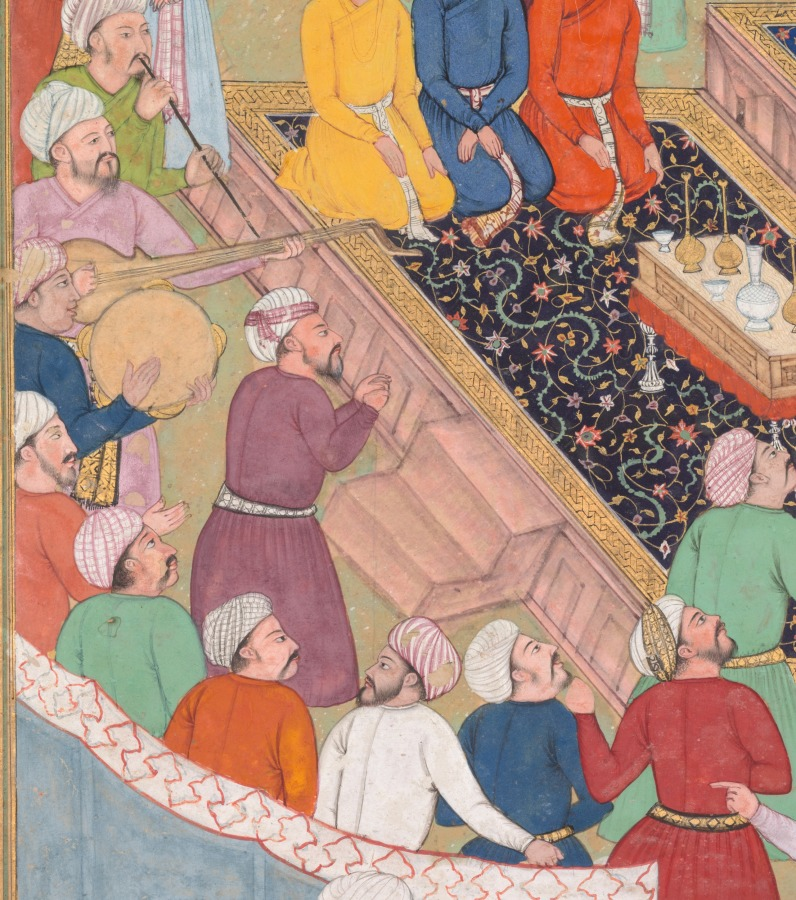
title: Hulagu Khan giving a feast and dispensing favor upon the amirs and princes, from a Chingiz-nama (Book of Chingiz Khan) of the Jami al-tavarikh (Compendium of Chronicles)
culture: Mughal India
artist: Lal (Indian, active c. 1555–1600)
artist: Dharam Das (Indian, active c. 1580–1605)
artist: Padarath (Indian, active late 1500s)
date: c. 1596–1600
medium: Gum tempera, ink, and gold on paper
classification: Painting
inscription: inscription at the base of the painting: tarih Lal 'amal-i Dharam Das tuze name cherehe Padarath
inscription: Persian inscription in top margin, in nasta‘liq script: Hulagu Khan giving a feast and dispensing favor upon the amirs and princes Persian inscription in bottom margin, in nasta‘liq script: Outline drawing by Lal, [color] work by Dharam Das, important portraits by Padarath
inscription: Verso: Text of Hulagu Khan giving a feast and dispensing favor upon the amirs and princes Persian text in nasta‘liq script: [cont. from recto] in the Land of Sham [Syria], [that] would surrender if he [Khurshah] gave the word; otherwise, it would have taken years before they could be overrun. So he [Hulagu] kept him for a while, and he was treated with respect and dignity. And then he dispatched him to the service of the Great Khan [Mongke]. And regarding his [Khurshah’s] death, there are different versions. The truth is that when news reached the Great Khan that Khurshah was on his way, he said: “Why are they bringing him [here] and tiring the packhorses to no purpose?” And he [Mongke] dispatched envoys who did away with him en route. And at this end, after Khurshah had been sent off on the road, they murdered his entire family and household on the road between Abhar and Qazvin, including men, women, and infants still in their cradles, so that not a trace of them was left. And the duration of the rule of the Ismailis in these regions is around one hundred and seventy-seven years, starting from the year four hundred and seventy-seven [AD 1084], and the word “Alamut” is its chronogram. It ended on the first of Dh’ul Qa’da 654 [20 November 1256]. And the number of their rulers is seven, in this manner and sequence: first, Hasan son of Ali son of Muhammad al-Sabbah al-Hamayri; second, Kiya Buzug Ummid, and he and Hasan [the first ruler listed] were both Ismaili missionaries; third, Muhammad Hasan Buzurg Ummid, who is known as ‘Ala dhhkirhi’l-Salam; fourth, Hasan son of Muhammad Buzurg Ummid; fifth, Muhammad Jalal al-Din son of Hasan and they call him Hasan the New Musulman; sixth, ‘Ala al-Din son of Muhammad son of al-Hasan son of Muhammad; seventh, Rukn al-Din Khurshah son of ‘Ala al-Din, in whose time the dynasty fell. And the conquest of those fortresses and edifices is finite proof of the plenitude of the good fortune of Mongke Khan and his brother Hulagu Khan, who managed to accomplish such a momentous task in such a short span of time with such ease and facility; for had it not been for that good fortune, the conquered domains would have been ruined, faced with the difficulties of providing and transporting provisions and drink. These are the events and accounts of the conquest of the lands of the Ismaili heretics, as mentioned above. Finis. The narrative of Hulagu Khan turning toward Kohistan after the capture of the heretics’ fortresses and receiving Bayju Noyan from Anatolia and his interrogation by Hulagu Khan and his dispatch again to Anatolia to complete the conquest Hulagu Khan, when he had completed the conquest of the citadels and lands of the [Ismaili] heretics, in Rabi‘ al-awwal of the year 655 [AD 1257] from the region of Qazvin, proceeded toward Hamadan. And Bayju Noyan arrived from the direction of Azerbaijan. Hulagu Khan was upset with him and shouted at him saying, “Since the passing of Churmaghun Noyan, what have you done in the Land of Iran, and which army have you defeated, and which rebel have you managed to bring into obedience, aside from instilling fear into the Mongol army with accounts of the caliph’s might and grandeur?” He [Bayju] knelt down and said: “I committed no wrong, but did what I could as presented to you. I have subjugated the land from the gates of Rayy to the borders of Anatolia and Syria, all save the matter of Baghdad. It is difficult to take the army there given the difficult roads ahead, the heavy population, and their vast army and arms. It is for the mighty ruler [padshah] to decide and I will obey whatever he decrees.” These words alleviated his [Hulagu’s] anger and he decreed thus: “You must go and conquer lands as far as the shores of the western sea from the hands of the sons of Efrins and Lanktar.” Bayju returned at once and took an army to Anatolia; and at that time the sultan of Anatolia, Ghiyath al-Din Kai-Khusrau son of ‘Ala al-Din, met Bayju Noyan in battle at Kusa Dagh and was defeated. And Bayju conquered the whole of Anatolia and indulged in plunder. And Hulagu Khan accompanied by princes Ghuli and Balagha and Tutar and chief commanders Buqa Timur and Qudusun and Qata and Sunjaq and Kuka Ilgai, camped in the Hamadan plain near Hatimabad, which is a meadow with tamarisk trees, and began to prepare and arrange the troops. Finis. The emergence of tumult in Baghdad and the discord between the chief secretary and the vizier and the beginning of the caliph of Baghdad’s demise In the year 654 [AD 1256] at the end of the summer, a great flood came down and inundated the city of Baghdad in such a way that the lower part of the buildings there were submerged in water and disappeared, and for fifty days the flood was on the rise, and then it began to subside, and half of the habitations in Iraq were destroyed, and to date the Musta‘sami Flood is remembered as a byword [for a damaging flood] among the people of Baghdad. And in the midst of this catastrophic event, the rabble, ruffians, and misfits embarked on looting and gained the upper hand and every day killed a lot of people. And Mujahid al-Din Aybek, the chief secretary, gathered the rabble and the misfits around himself and in a short space of time built up a power base, and when he felt empowered and saw that Caliph Musta‘sam was indecisive and naive in judgment, he consulted with some of the notables in order to oust him from his position and place another Abbasid in his place, and vizier . . .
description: Seated on a lapis-blue floral carpet is Chingiz (Genghis) Khan’s grandson, who ruled Iran from 1256 to 1265. This painting is from an illustrated copy of the history of Chingiz Khan and his family that the Mughal emperor Akbar commissioned toward the end of the latter’s life. Mughal is the Persian word for Mongol, and Akbar traced direct genealogical descent from Chingiz Khan on his mother’s side. The nomadic Mongols created court settings using portable platforms and elegant carpets and tents. Multilevel canopies of imperial crimson mark the position of the khan, which means “ruler” in Mongolian.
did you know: Mongol rulers were identified by the five-feathered crown.